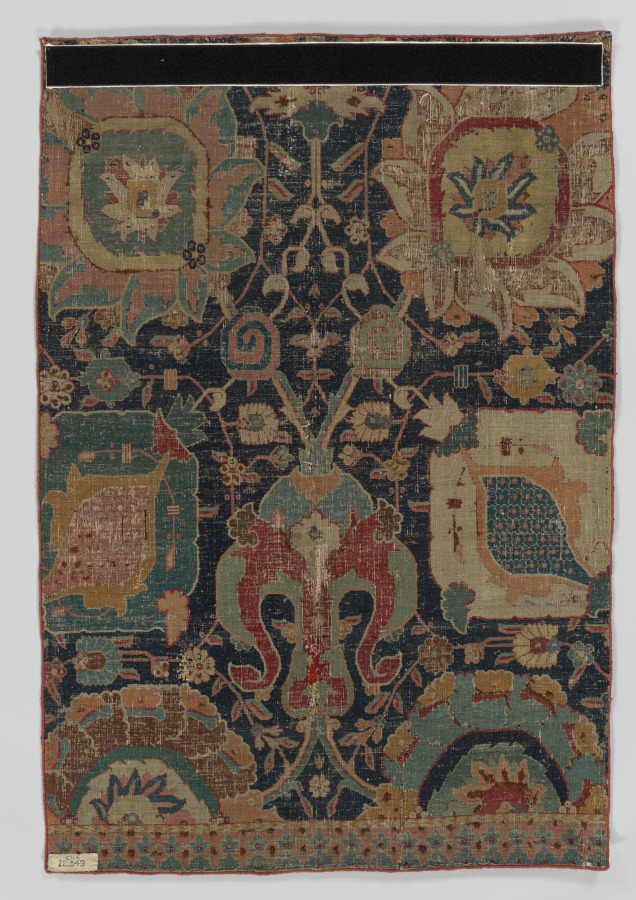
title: Carpet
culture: Iran, Kerman, 17th century (probably)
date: 17th century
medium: senna knot: wool and cotton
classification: Carpet